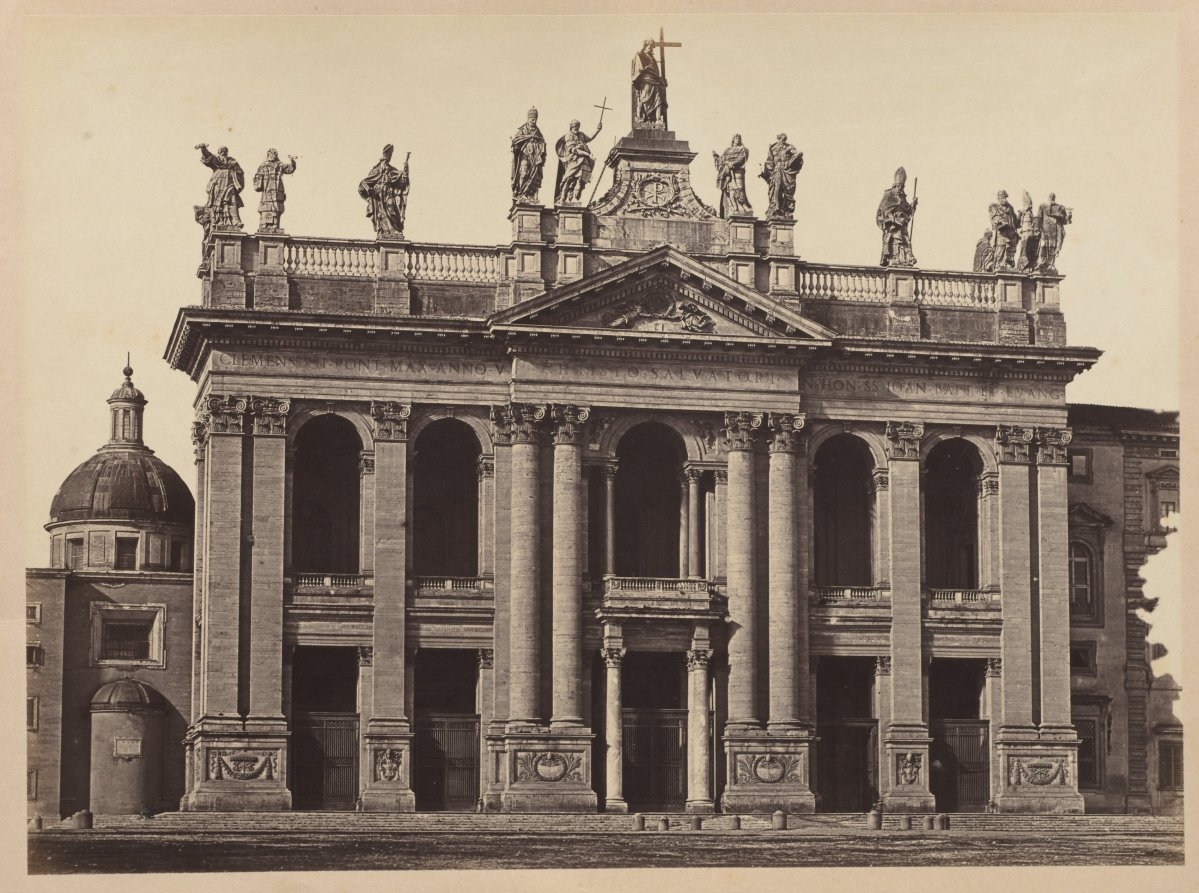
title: St. Jean de Lateran, Rome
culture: Italy, 19th century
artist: attributed to Tommaso Cuccioni (Italian, 1864)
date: c. 1860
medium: albumen print from collodion negative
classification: Photograph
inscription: Written in pencil on verso of mount: "Photo Cuccioni" "IT-05" Written in pencil on recto of mount: "Cuccioni" Blind stamp on recto of mount: "FOTOGRAFIA/CUCCIONI" Written in pencil on verso of mount: "Clim??t?? Poutr?? Jean Baft??enoug? (messy cursive writing, possibly Italian or French)" Typed label that arrived with photo: "CUCCIONI, Tommaso (c. 1790-1864)/Saint Jean de Latran/Rome vers 1860/Epreuve sur papier albumin, 230*309 mm, collée sur carton, timbre sec/du photographe et inscriptions sur le montage"